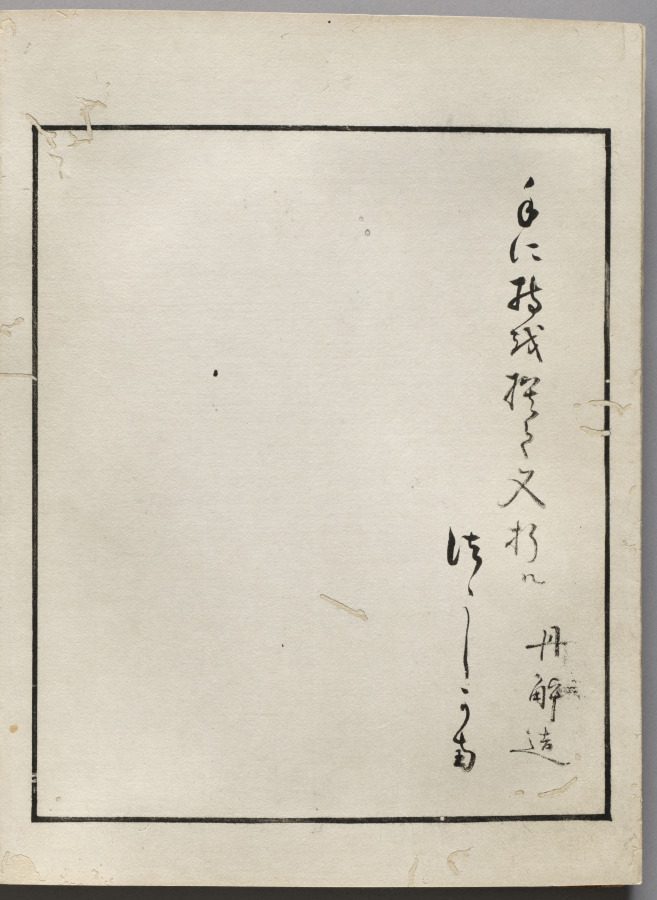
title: Double-Leaf from Album of Actor Portraits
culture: Japan, Edo period (1615–1868)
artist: Shōrakusai (Japanese)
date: c. 1790–1810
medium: double-leaf from an accordion-style album; ink and color on silk (left)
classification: Bound Volume